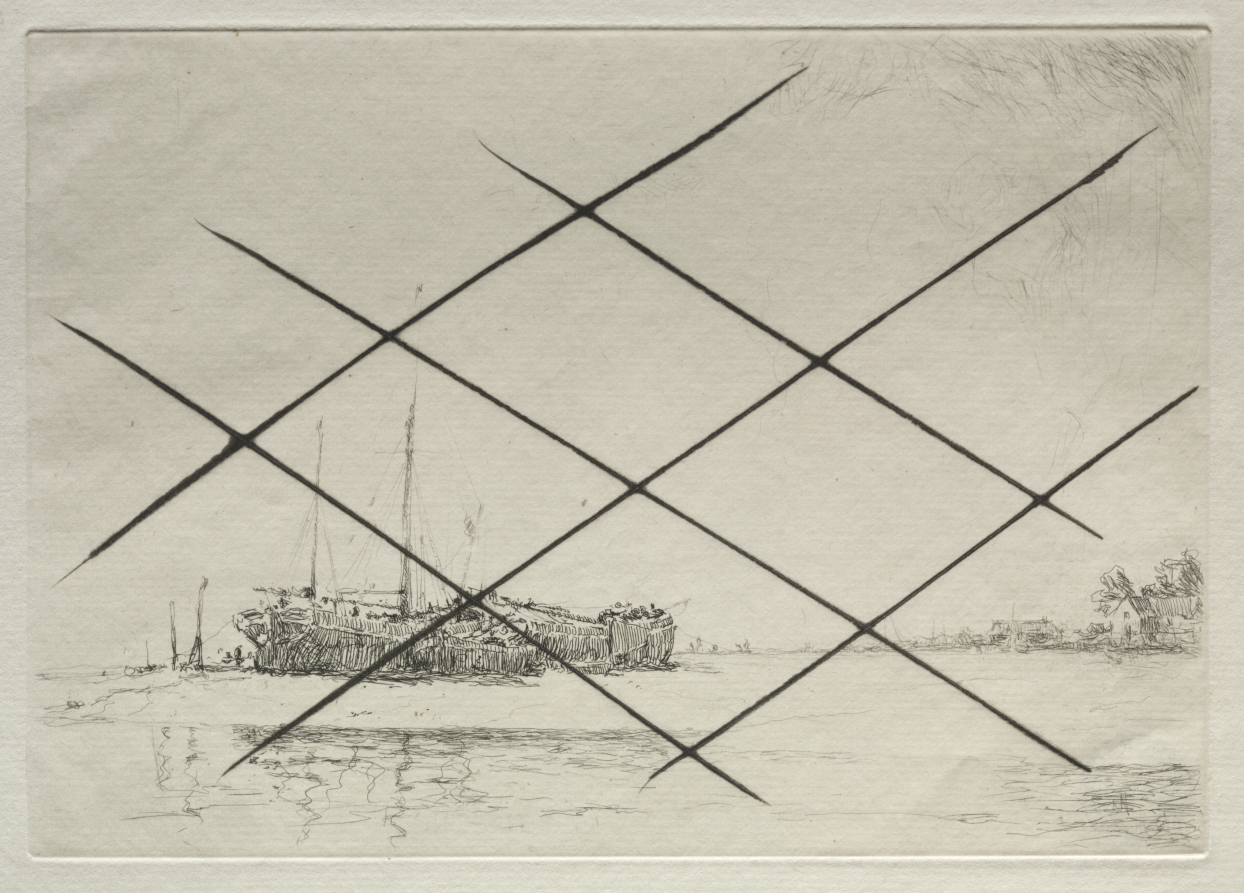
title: On the Hard, At Pin Mill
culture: England, 20th century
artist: Arthur John Trevor Briscoe (British, 1873–1943)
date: c. 1900–1937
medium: etching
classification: Print